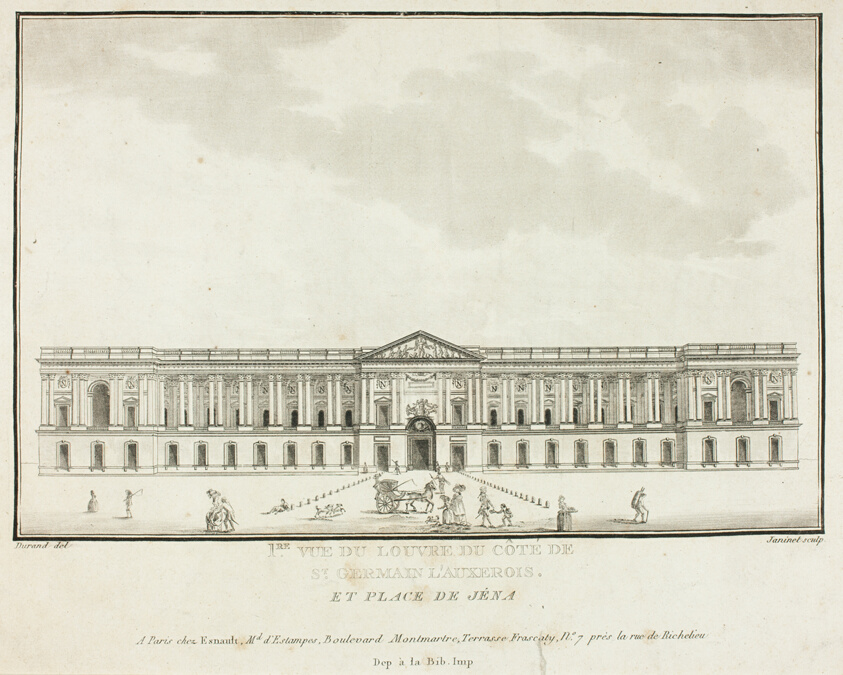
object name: Print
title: View of the Louvre from the Side of St. Germain l'Auxerrois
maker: Louis Français (French, 1814-1897)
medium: Aquatint on paper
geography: France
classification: etching; print; prints and drawing